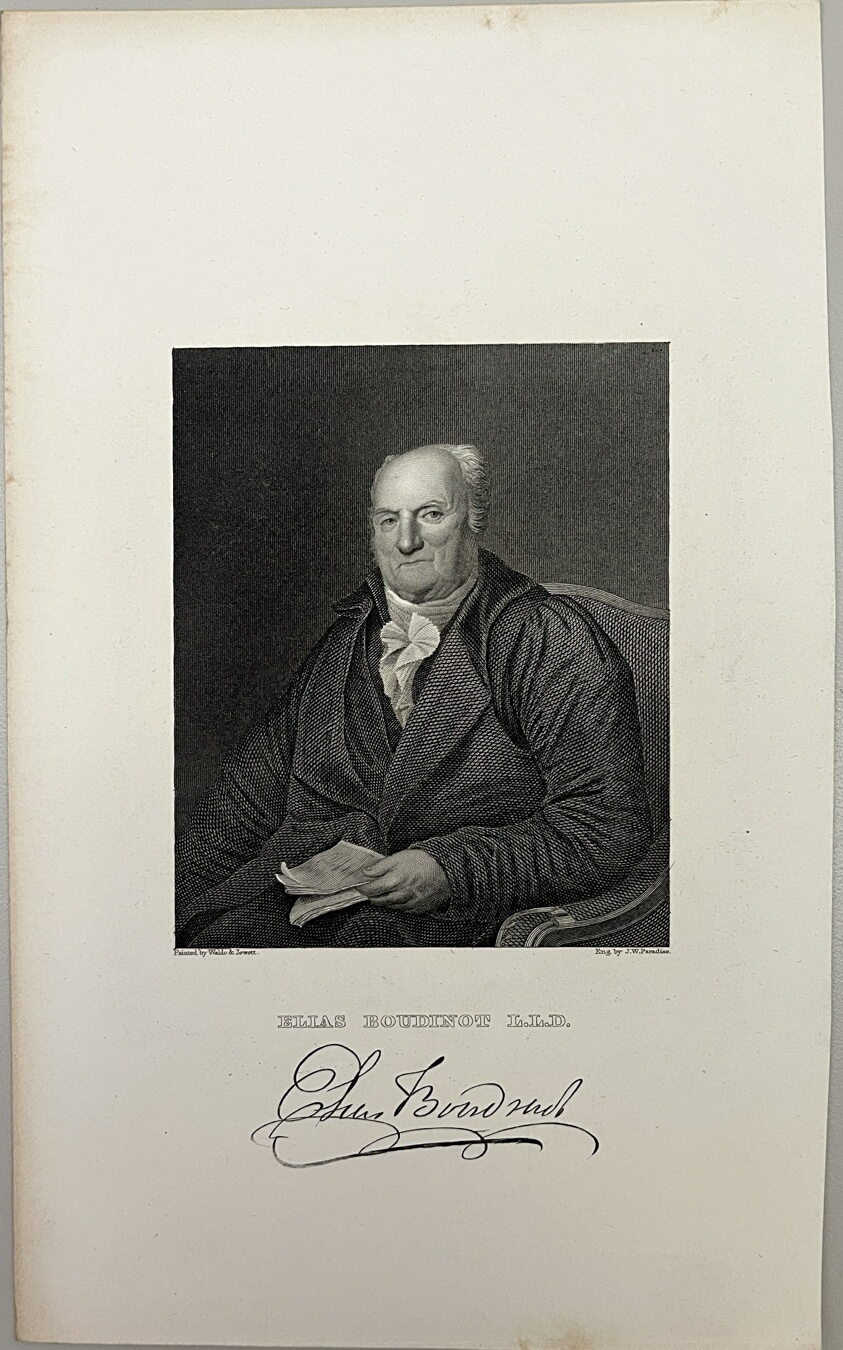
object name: Print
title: Elias Boudinot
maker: John Wesley Paradise (American, 1809-1862); after William Jewett (American, 1792-1874); and Samuel Lovett Waldo (American, 1783-1861)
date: 1825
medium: Steel engraving on paper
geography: United States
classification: reproduction; print; prints and drawing